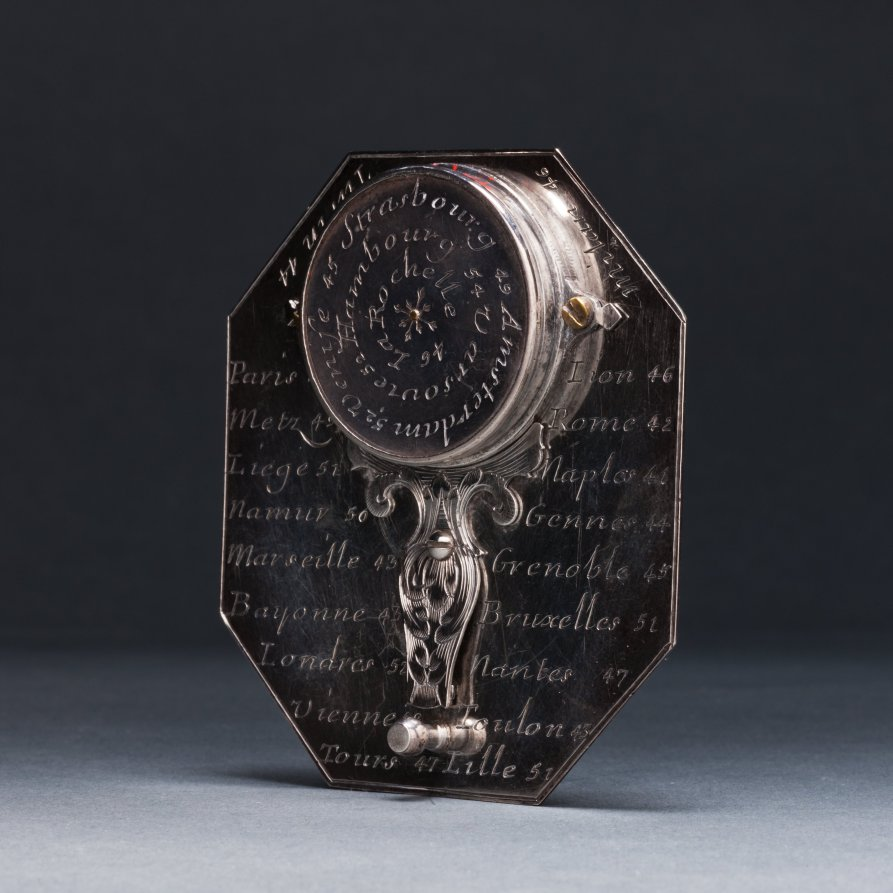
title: Butterfield Sundial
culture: France, 18th century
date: 1700s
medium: silver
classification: Silver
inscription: [Engraved signature above the compass in ribbon band]: "N. BION A Paris"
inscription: [Engraved on the face of the sundial]: “Pour 55° 4-5-6-7-8-9-10-11 50° IIII-V-VI-VII-VIII-IX-X-XI 45° 5-6-7-8-9-10-11 40° -VI-VII-VIII-IX-X-XI'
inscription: [Engraved on the other side]: "Pour 55° -8-7-6-5-4-3-2-1-0 50°-VIII-VII-VI-V-IIII-III-II-I 45°-8-7-6-5-4-3-2-1 40°-VII-VI-V-IIII-III-II-I"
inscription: [Engraved around the compass]: “NORD-OUEST-SUD-EST”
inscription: [Engraved on the back of the sundial]: “Turin 44 Milan 46 Paris 49 Lion 46 Metz 49 Rome 42 Liege 51 Naples 44 Namur 50 Gennes 44 Marseille 43 Grenoble 45 Bayonne 43 Bruxelle 51 Londres 52 Nantes 47 Vienne 48 Toulon 43 Tours 47 Lille 51”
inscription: [Engraved around the back of the compass]: “Venise 45 Strasbourg 49 Amsterdam 52 Hambourg 54 Varsovie 52 La Rochelle 46”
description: Butterfield-type sundials are characterized by their adjustable gnomons, metal flaps that cast a shadow on the dial’s face to indicate the hour, and geographical indices. This sundial has a scale adjustable between latitudes of 40° to 60° north. The latitudes of 26 European towns are engraved on its back for quick reference. With an intricately engraved silver face, it would have functioned as a fashionable traveler’s accessory.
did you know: Butterfield-style sundials were named after Micheal Butterfield, an English scientific and mathematical instrument maker who worked in Paris between 1674 and 1724.